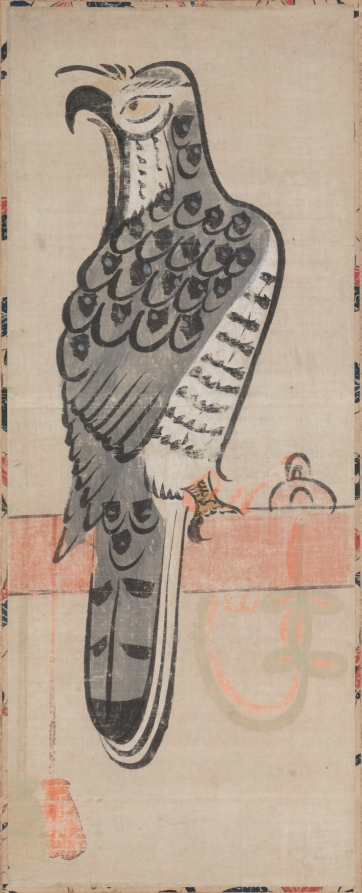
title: Falcon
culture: Japan, Edo period (1615–1868)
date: 1615–1868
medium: hanging scroll; ink and color on paper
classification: Painting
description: This otsu-e painting depicts a hunting falcon, a lucky charm for a bountiful harvest.